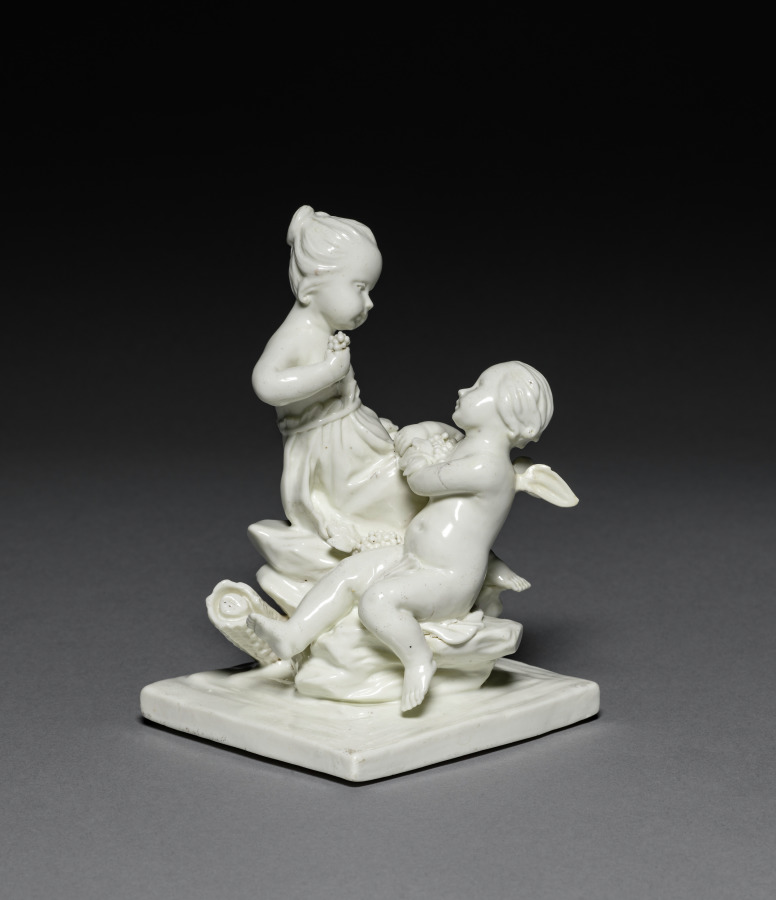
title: Girl with Putto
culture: France, Chantilly, 18th century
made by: probably by Chantilly Porcelain Factory (French)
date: 1760s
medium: soft-paste porcelain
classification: Ceramic